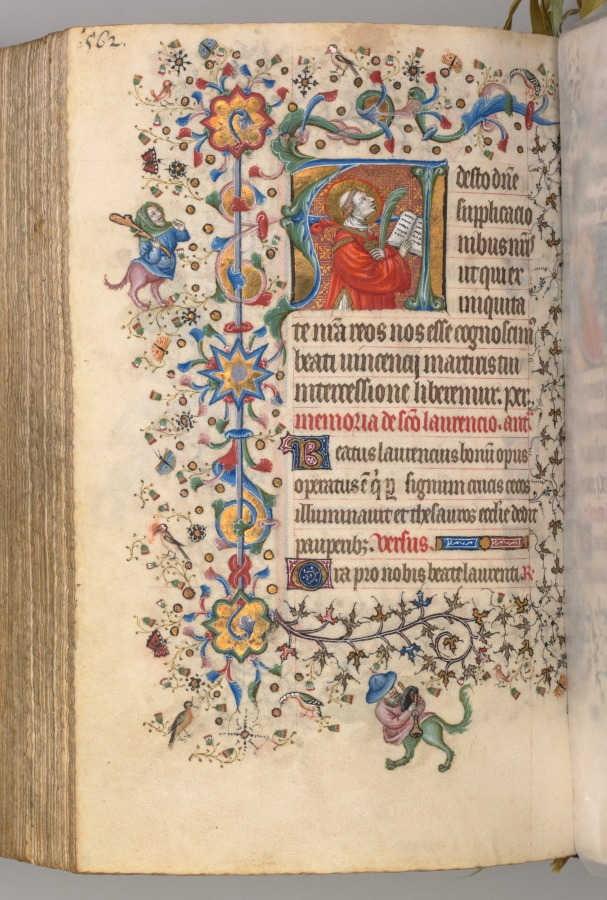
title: Hours of Charles the Noble, King of Navarre (1361-1425): fol. 275v, St. Vincent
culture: France, Paris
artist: Master of the Brussels Initials and Associates (French)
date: c. 1405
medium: ink, tempera, and gold on vellum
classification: Bound Volume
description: This precious volume was obviously highly prized by its owner, the French-born King of Navarre, who had his coat of arms painted on no less than twenty folios. Rather than directly commissioning this manuscript from a specific workshop, it seems that Charles the Noble acquired his book of hours -- perhaps ready-made for the luxury market -- while on a trip to Paris in 1404-05. A collaborative effort, six painting styles are evidenced within the pages of this codex, those of two Italians, two Frenchmen, and two Netherlanders. The painter who was responsible for the planning and decoration of the book, and who produced seventeen of the large miniatures, was a Bolognese artist known as the Master of the Brussels Initials. His principal assistant, responsible for most of the borders, was a Florentine who signed his name "Zecho" da Firenze on folio 208 verso.